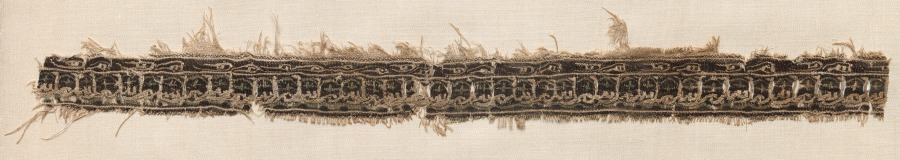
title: Fragment of a Tiraz-Style Textile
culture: Egypt, Fatimid period, probably Caliphate of al-Amir, AH 495-524, 12th Century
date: 1101 – 1130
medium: tabby ground with inwoven tapestry ornament; linen and silk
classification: Textile